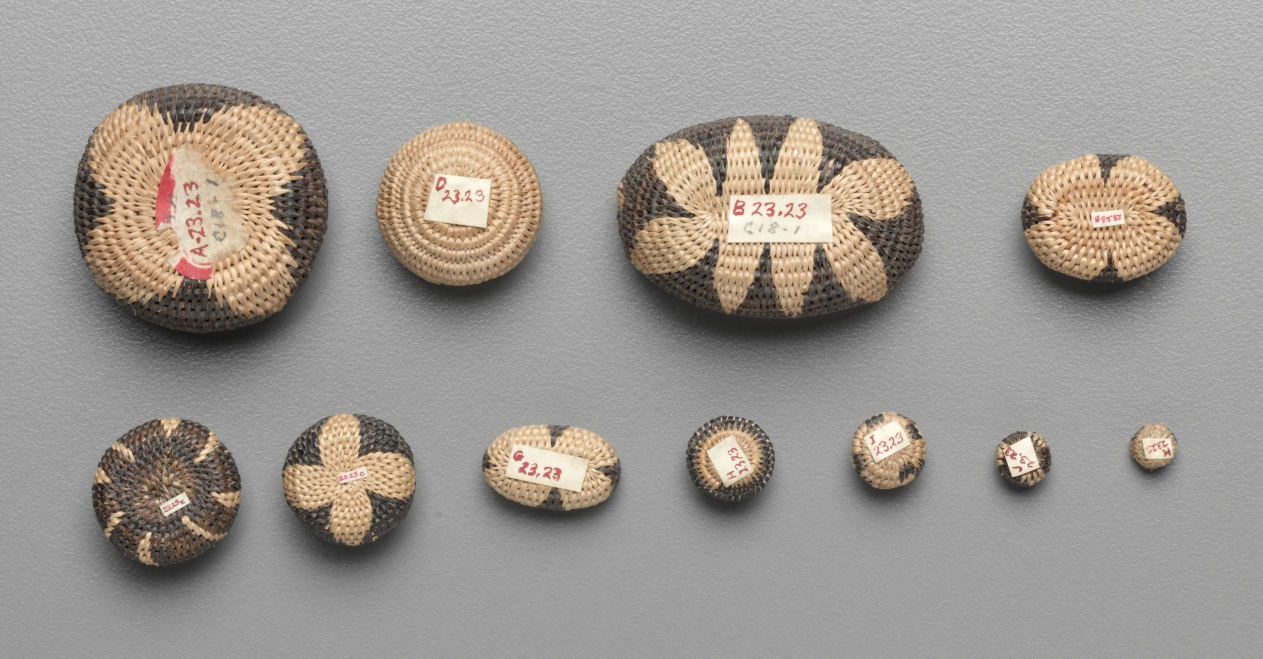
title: Miniature Basket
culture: America, Native North American, Southwest, Arizona, Akimel O'odham (Pima), Unassigned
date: before 1923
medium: plant fiber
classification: Basketry